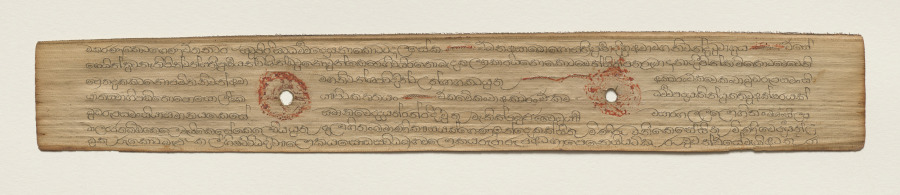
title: Leaf from a Buddhist Manuscript (verso)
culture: Sri Lanka, Singhalese, Late 17th century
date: c. 1700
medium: fiber paper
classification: Manuscript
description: Palm leaf material is still used for manuscripts in Sri Lanka. The palm leaves are prepared first by boiling them, drying them in the sun, and then rubbing them with oils. Scribes then use a metal stylus to incise the text. Then charcoal powder is wiped across the pages, filling in only the inscribed lines.